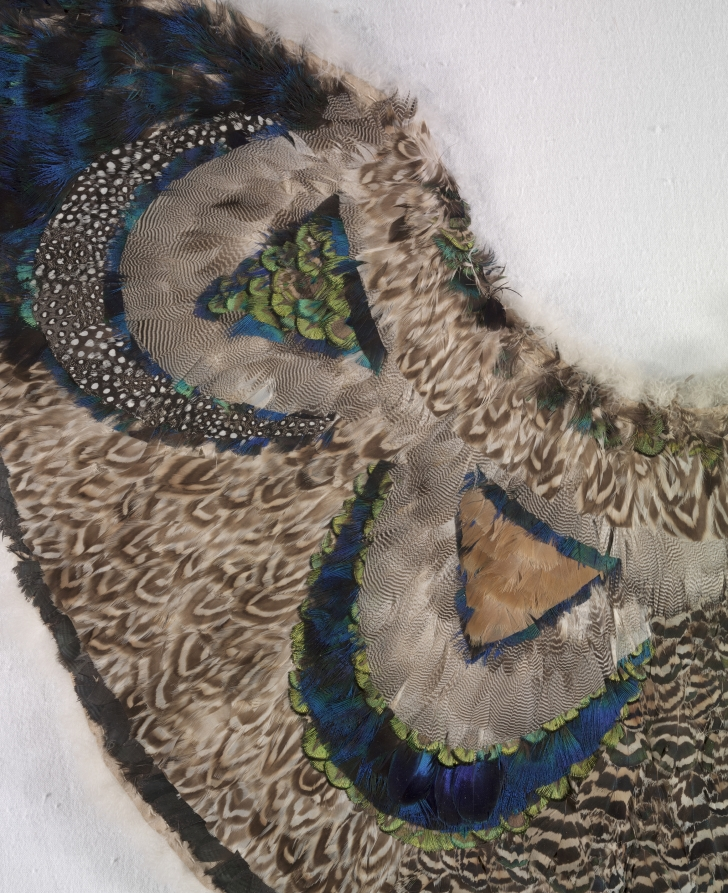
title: Pelerine (Collar or Cape)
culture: Northeastern Woodlands, Great Lakes/St. Lawrence River Region or Europe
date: c. 1830–1860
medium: Cotton, peacock feathers, guinea fowl feathers?, Gadwalls duck feathers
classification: Textile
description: Experts argue about collars of this type: Did a Great Lakes native artist make it, using as a model an English lady’s pelerine and exotic feathers obtained through trade? Or was the collar created by a European feather worker, perhaps after seeing the spectacular feather capes of native Hawaiian royals who visited England in 1824? There are arguments for both views—and for further research.